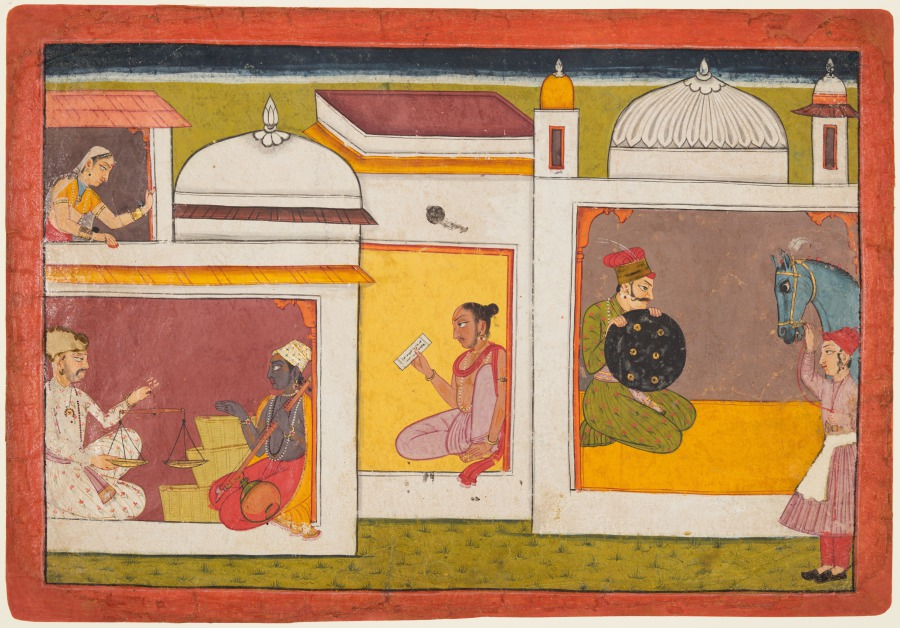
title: Madhava faces a man holding a scale, folio 1 from a Madhavanala-Kamakandala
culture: Northern India, Pahari kingdoms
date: c. 1720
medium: gum tempera, ink, and gold on paper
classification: Painting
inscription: Takri number ‘1’ on verso; one line of Takri script; (in English) Roman numeral: XI; K. Iswari Singh of Sirmur; puhpāvatī nagarī īka sunā. gobiṃdachaṃda rajā bahugunā.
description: In the opening page of the series, the artist sets the scene in the city of Pushpavati. The protagonist Madhava holds a stringed instrument (vina), which he plays so bewitchingly that women become entranced. His good looks and musical talent earn him extra riches, which are being presented to him at the lower left. Other Brahmin priests and members of the nobility become jealous.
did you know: This is the first page in the series, five of which are in the Cleveland Museum of Art collection.